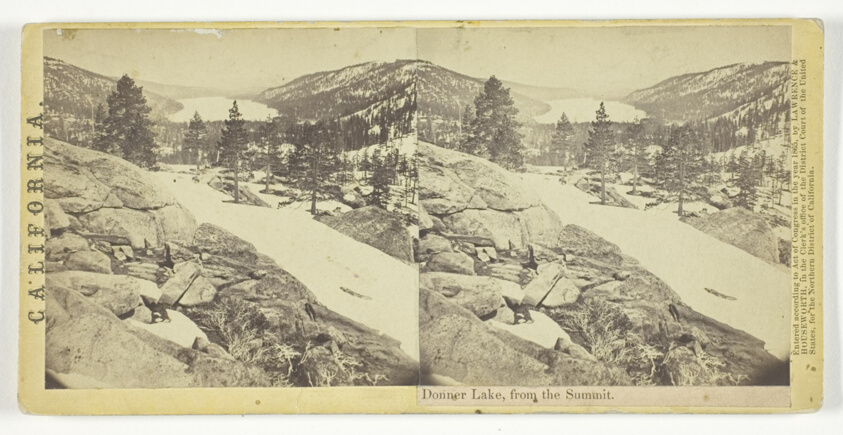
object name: Photograph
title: Donner Lake, from the Summit, from the series "California"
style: 19th century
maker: Lawrence & Houseworth; American, active 1860s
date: 1865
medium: Albumen print, stereo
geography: United States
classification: stereograph (albumen); albumen silver print; photographic process; photography; photograph